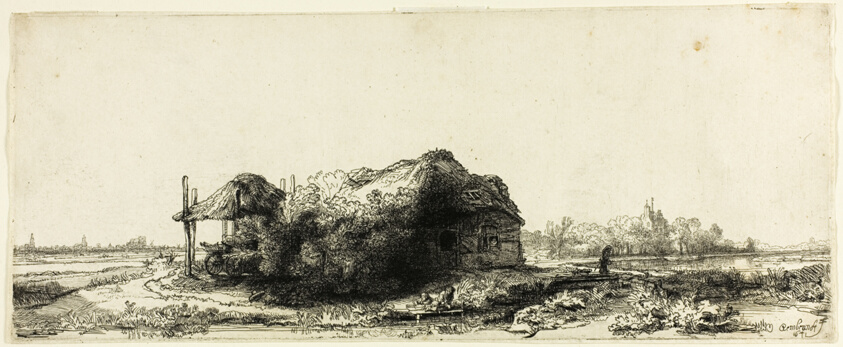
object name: Print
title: Landscape with Cottages and a Hay Barn: Oblong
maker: Rembrandt van Rijn (Dutch, 1606-1669)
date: 1641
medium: Etching on off-white laid paper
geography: Holland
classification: etching; print; prints and drawing; paper